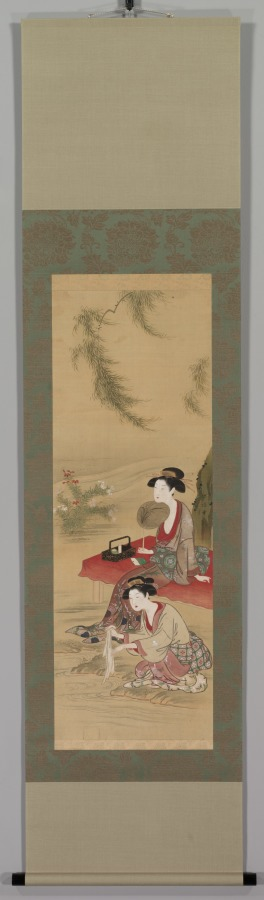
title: Beneath the Willow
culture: Japan, Edo period (1615–1868)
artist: Tsukioka Sessai (Japanese, d. 1839)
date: after 1778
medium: Hanging scroll; ink and color on paper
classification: Painting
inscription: Signed: Bridge of the Law Sessai (Hokyo Sessai). Sealed: Sessai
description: Two young women cool themselves by a river as a willow blows in the breeze. One crouches down to rinse a hand towel, while the other sits with her chin balanced on her fan. Beside her is a black lacquer tray with a floral design in gold, holding her tobacco kit. Tsukioka Tessai was an Osaka-based ukiyo-e artist who was especially respected for his representations of beautiful women (bijin). The court bestowed upon him the rank Bridge of the Law (hokyo) in 1778, and he was eventually elevated in rank to Eye of the Law (hogen).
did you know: The willow tree may refer to the contemporary Edo fashion for elongated "willowy" beauties.